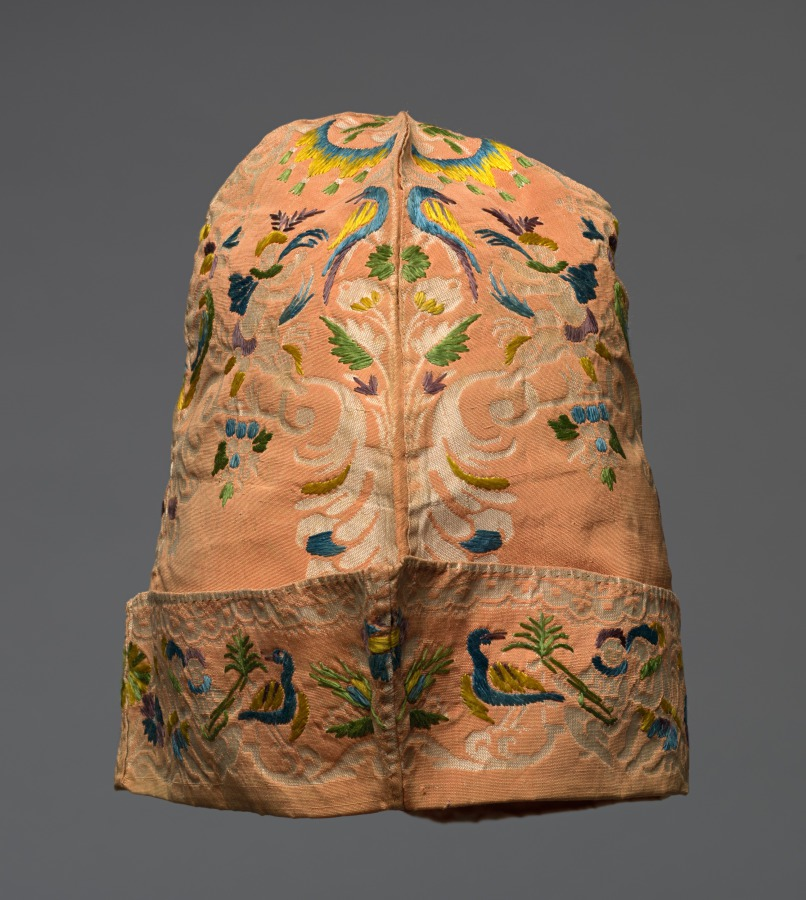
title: Man's Cap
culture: France, 18th century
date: 1700s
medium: brocade, silk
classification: Garment